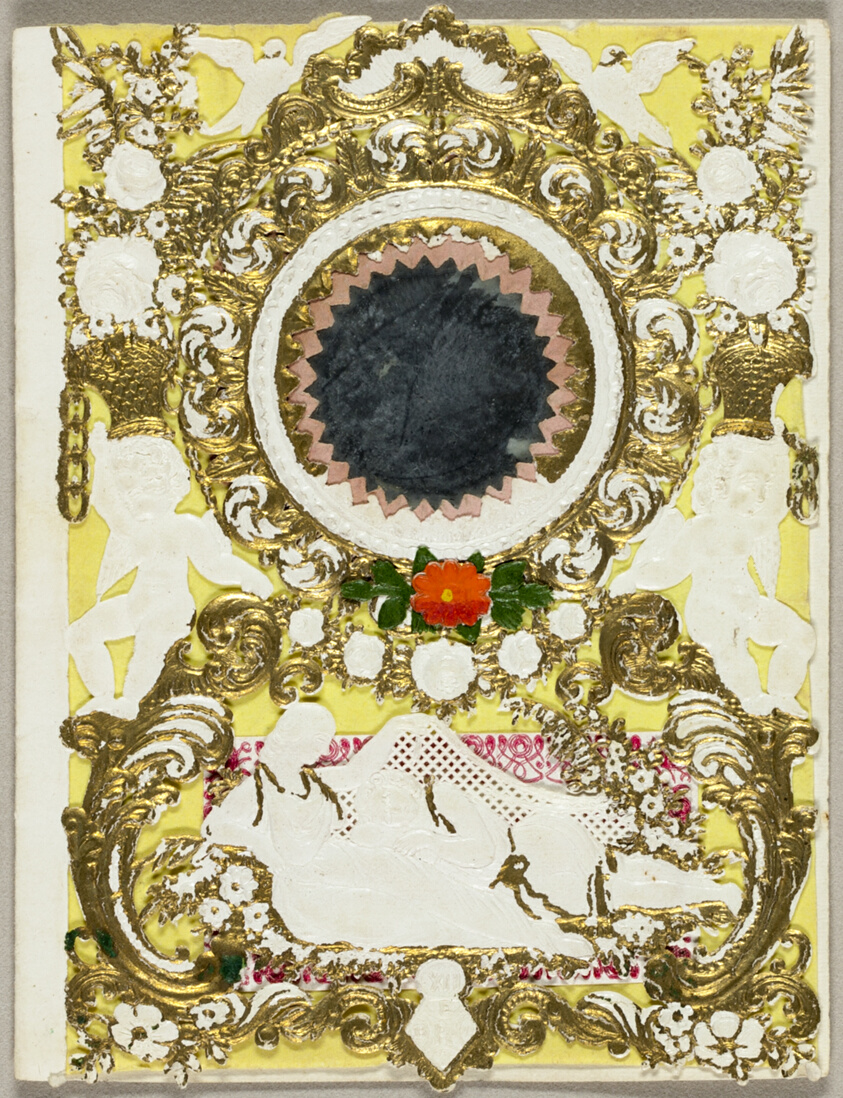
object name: Drawing and Watercolor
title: Untitled Valentine (Reclining Antique Couple)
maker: John Windsor (English, 19th century)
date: 1855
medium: Collaged elements and gold paint on cut and embossed (designed) ivory wove paper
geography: England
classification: collage; valentine; prints and drawing; paper